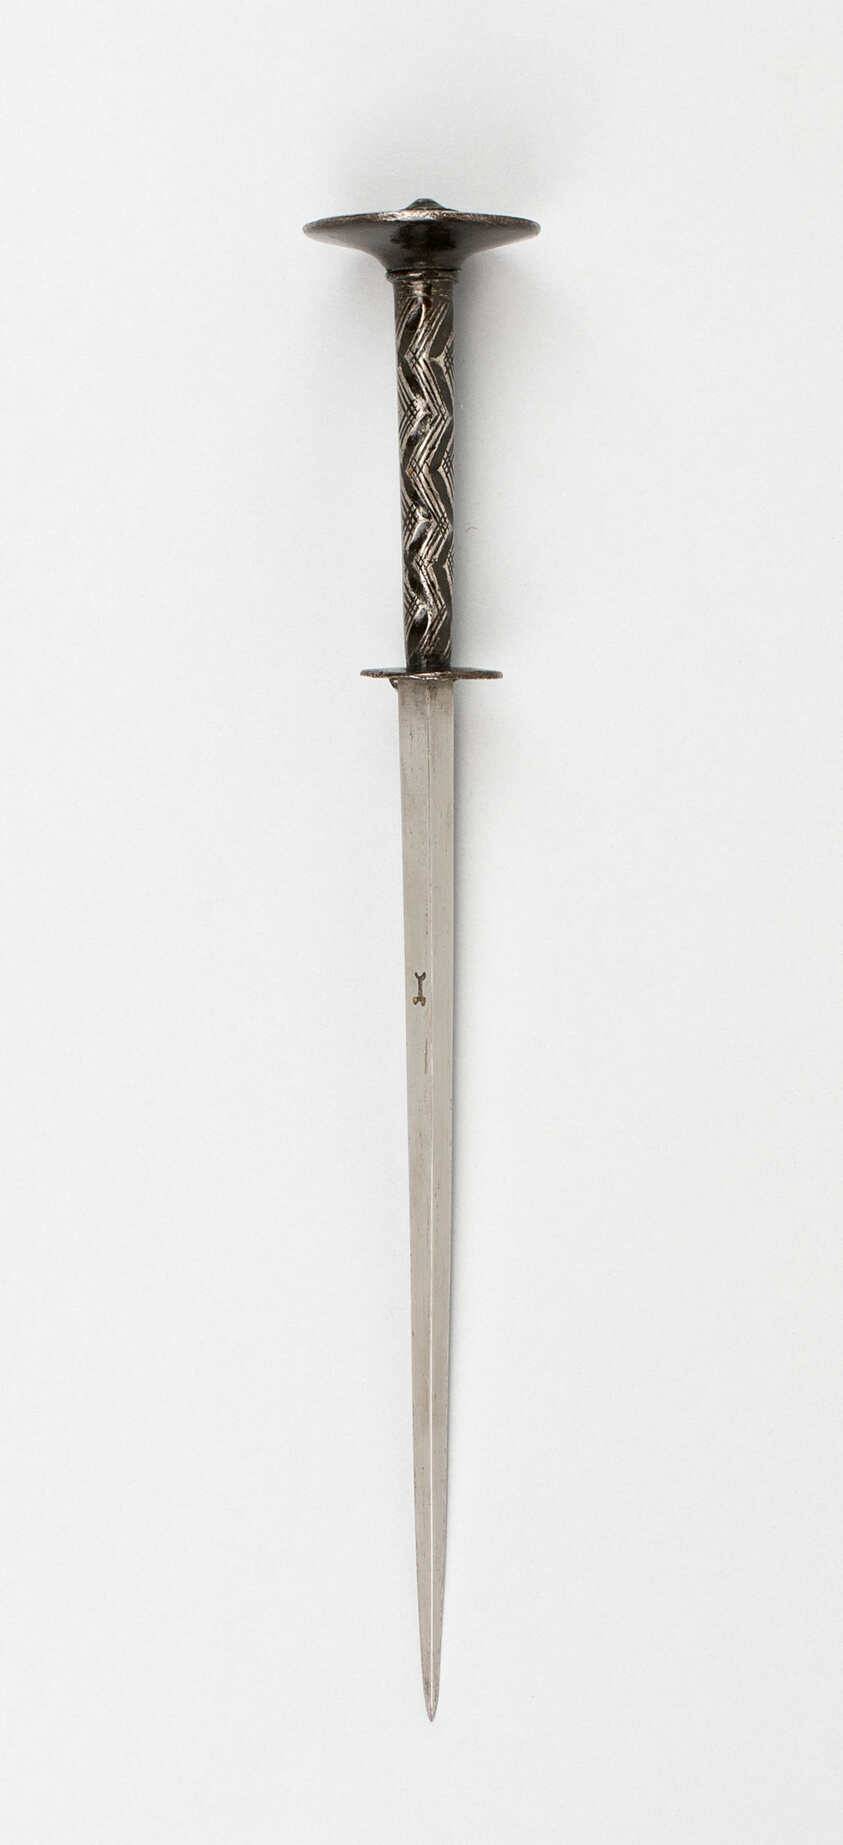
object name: Arms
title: Rondel Dagger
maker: German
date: 19th century in early 15th century style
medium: Steel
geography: Germany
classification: edged weapon-dagger; arms; arms and armor